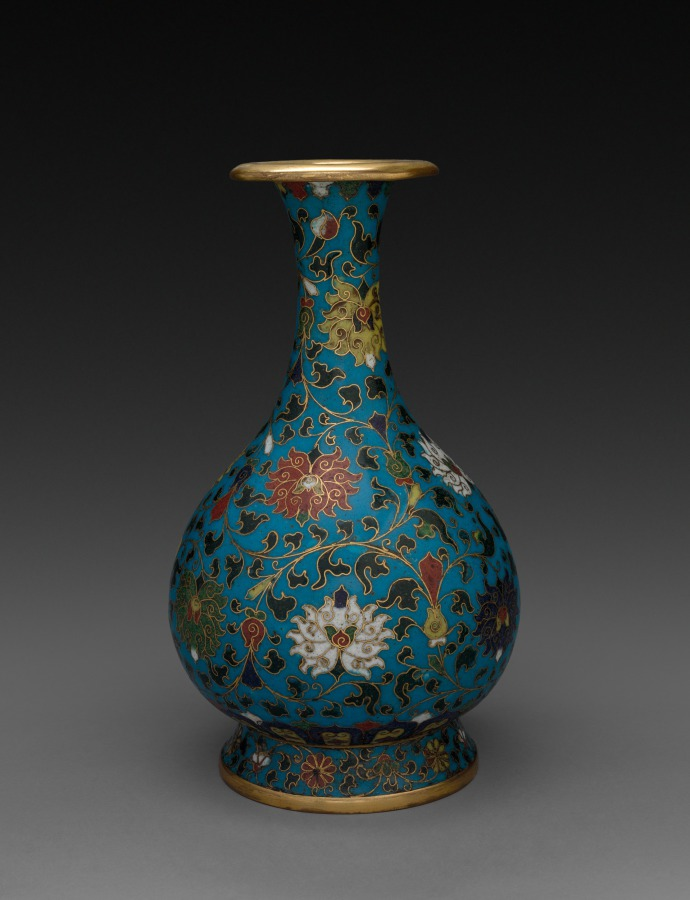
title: Vase with Floral Scrolls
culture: China, Ming dynasty (1368–1644)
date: 1600s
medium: cloisonné enamel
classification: Enamel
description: In cloisonné enameling, the decorative patterns are outlined by soldering metal wires (usually copper) to a metal base, creating a network of cells, or cloisons, to be filled with powdered enamels. Here. a turquoise ground separates the stylized chrysanthemum flower and leaf pattern, which winds around the neck and body. After firing, the enamels are polished to create a smooth surface level with the cloisons. The exposed metal surfaces are gilt.